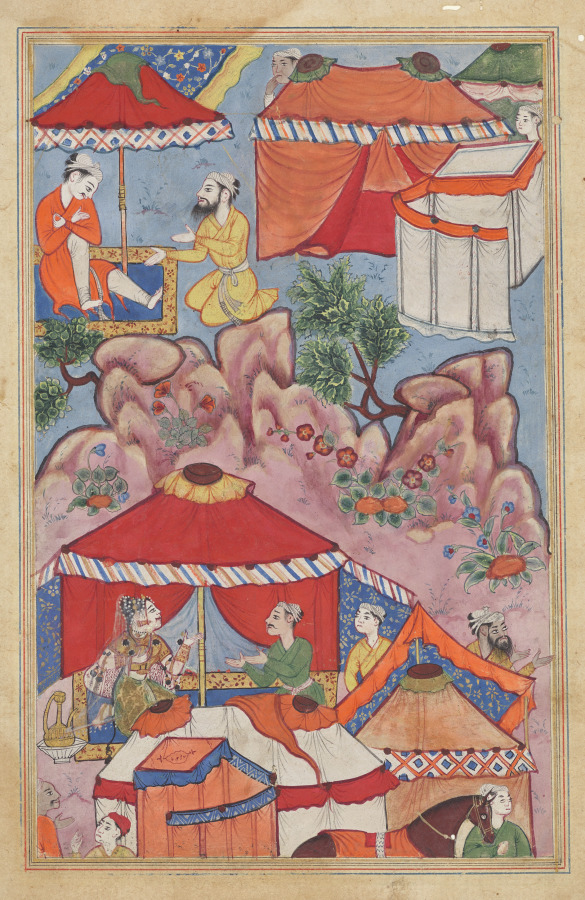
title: Bashir confides his love for Habbaza to an Arab friend, and sends him to her with a message, from a Tuti-nama (Tales of a Parrot): Twenty-fourth Night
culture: Mughal India, court of Akbar (reigned 1556–1605)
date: c. 1560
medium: gum tempera, ink, and gold on paper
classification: Painting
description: In the upper register, Bahir, dressed in orange, conveys a message to his friend for his lover Habbaza. Habbaza herself, who is married to another man, waits for the message in her tent. Other villagers appear throughout the painting, some gesturing in surprise, signaling how news of the clandestine affair spread among the people of Habbaza’s tribe.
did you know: Bahir’s friend, wearing yellow, appears both in the upper register and outside Habbaza’s tent.